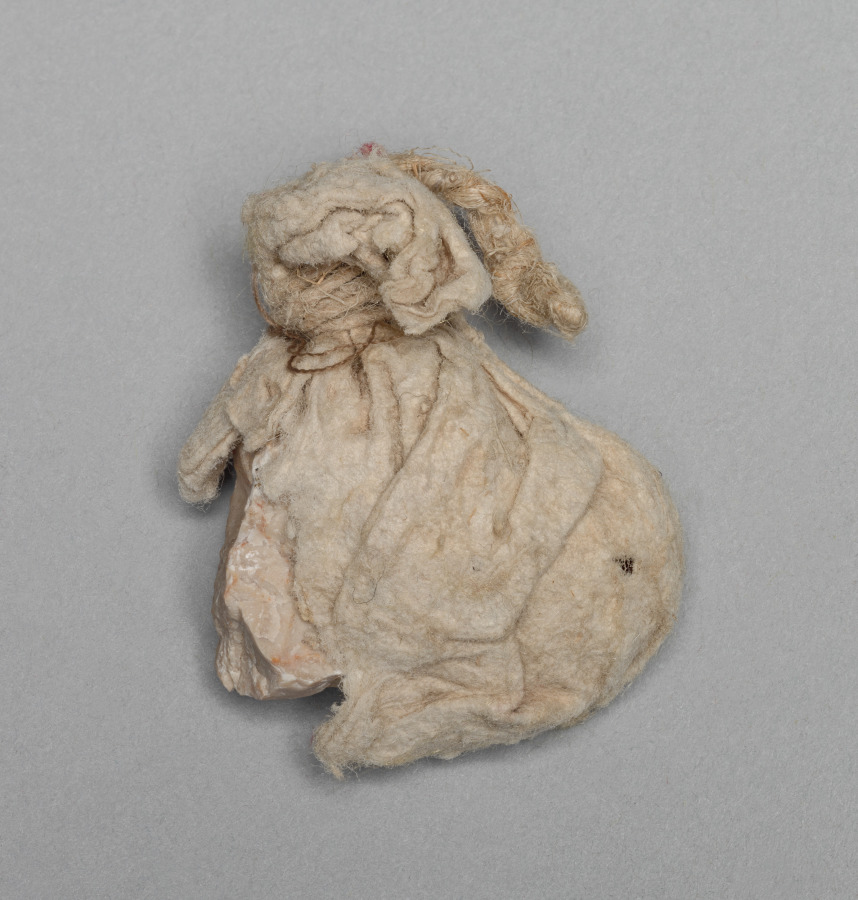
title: Relic of the Stone which Supported the Cross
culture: Germany, Lower Saxony?, Romanesque period, 11th century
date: c. 1045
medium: Limestone, felted fiber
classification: Metalwork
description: This relic is housed inside of the portable altar commissioned by Countess Gertrude of Brunswick, one of the Guelph Treasure’s earliest and most sumptuous objects.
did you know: The accompanying parchment identifies the piece of limestone as a portion of the block used to support the Holy Cross on Mount Golgotha.